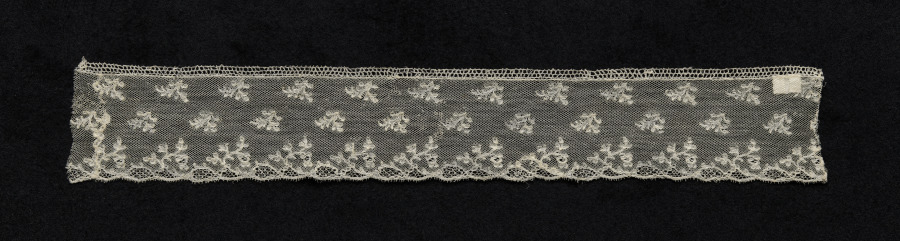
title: Lace Edging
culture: Belgium, Mechelen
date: 1700s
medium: Linen: bobbin lace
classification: Lace